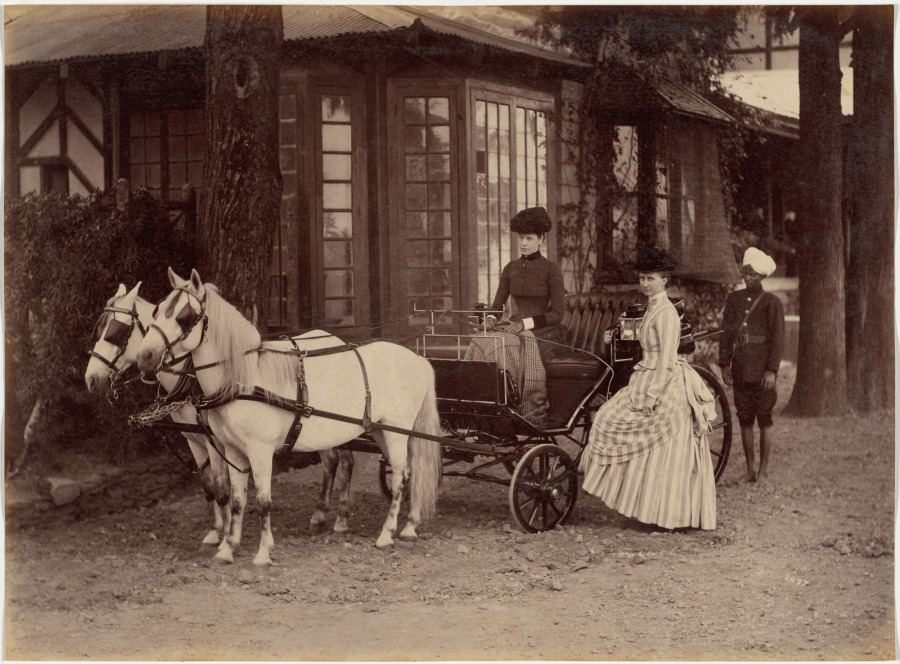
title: Mrs. and Miss Lyall, Shimla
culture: India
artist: Raja Deen Dayal (Indian, 1844–1905)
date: 1887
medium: albumen print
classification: Photograph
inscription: Stamped in black ink on verso: “8.H.7”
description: A number of Deen Dayal’s Simla portraits include rickshaws, which were items of great novelty, being found in India only in Simla at the time. The two-wheeled, human-powered passenger cart first appeared in Japan around 1870 and was introduced to Simla around 1880 by a Scottish missionary. The town’s steep hills required four drivers, two to pull and two to push. Horse-drawn buggies were another common means of transport. Miss Lyall and Mrs. Lyall also appear in the photograph, suggesting that they had a significant personal relationship with the purchaser of the album.